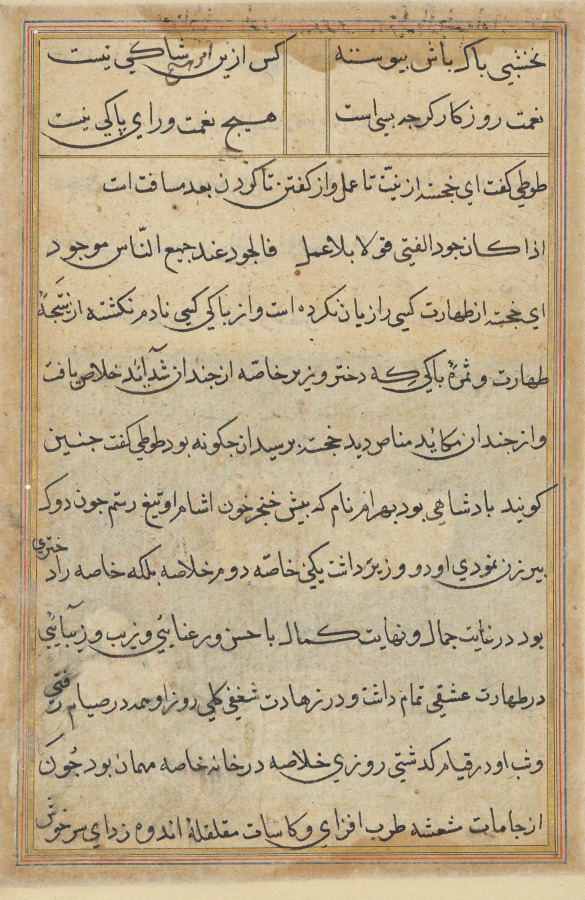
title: Page from Tales of a Parrot (Tuti-nama): text page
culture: Mughal India, court of Akbar (reigned 1556–1605)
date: c. 1560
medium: gum tempera, ink, and gold on paper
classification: Painting